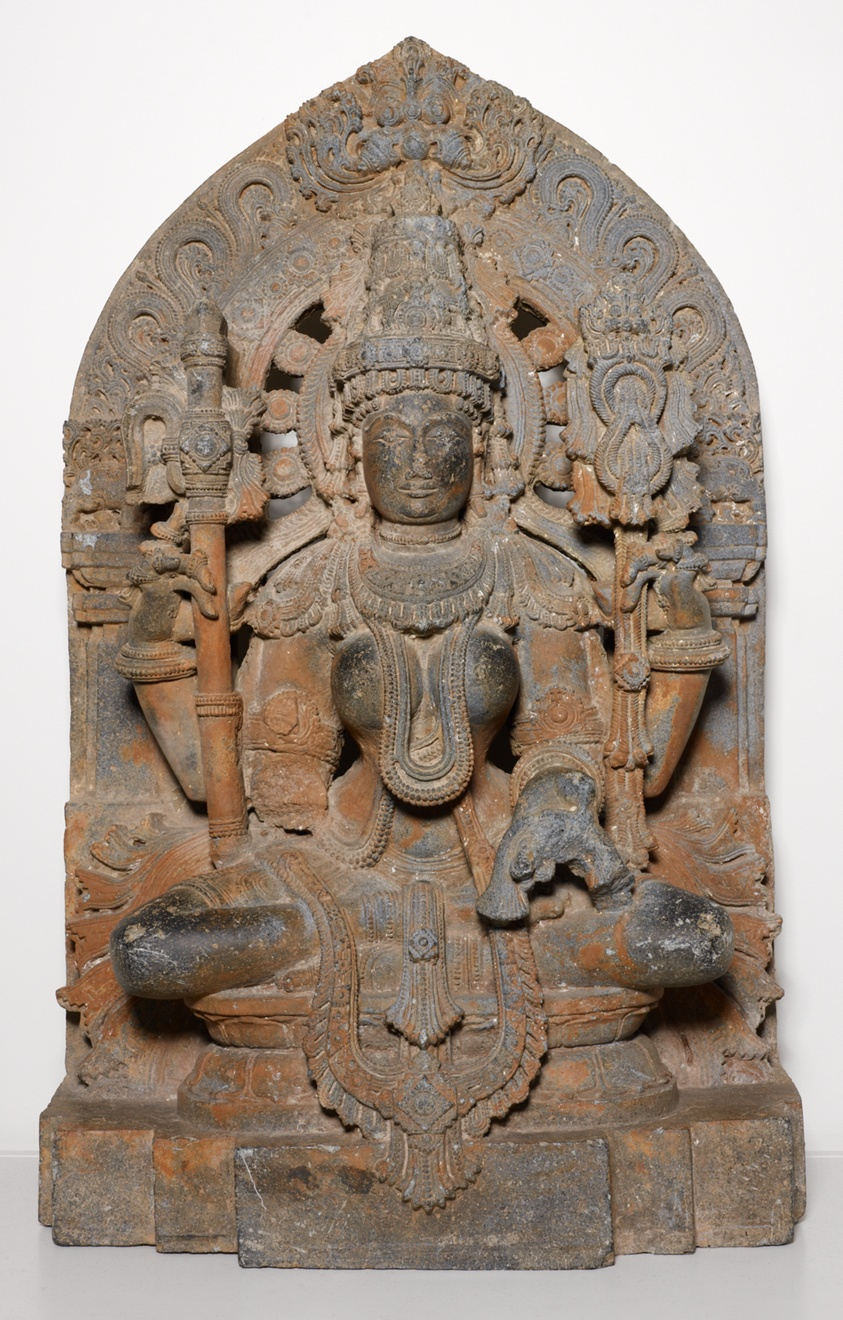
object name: Sculpture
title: Four-Armed Sarasvati, Goddess of Learning, Seated in Lotus Position (Padmasana)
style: South Asian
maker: India; Karnataka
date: Hoysala period, 12th century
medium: Chlorite phyllite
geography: Karnataka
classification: schist; stone; sculpture; asian art